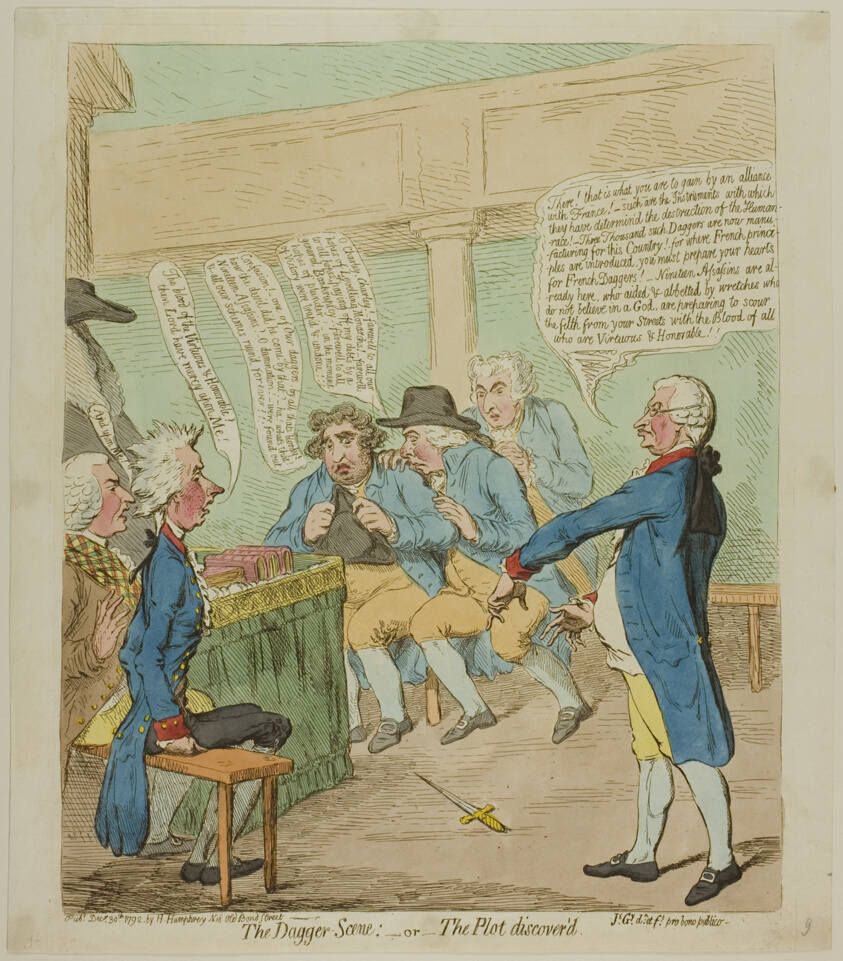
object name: Print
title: The Dagger Scene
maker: James Gillray (English, 1756-1815); published by Hannah Humphrey (English, c. 1745-1818)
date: published December 30, 1792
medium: Hand-colored etching on paper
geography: England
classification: etching; print; prints and drawing